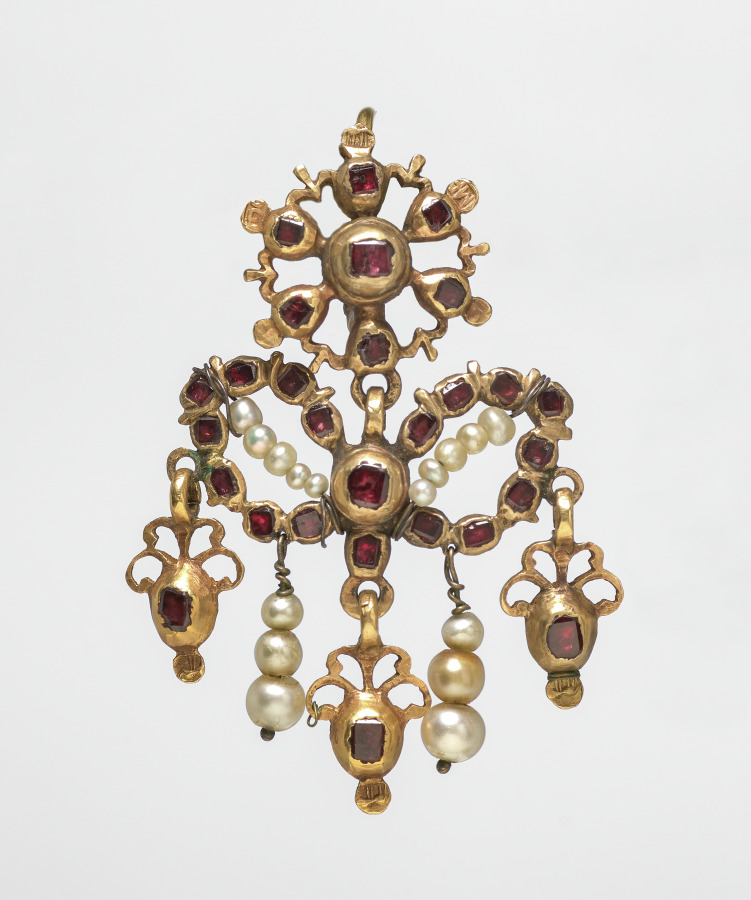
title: Woman's Costume (Earring)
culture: Italy, 19th century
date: 1800s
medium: gold and jewels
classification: Jewelry